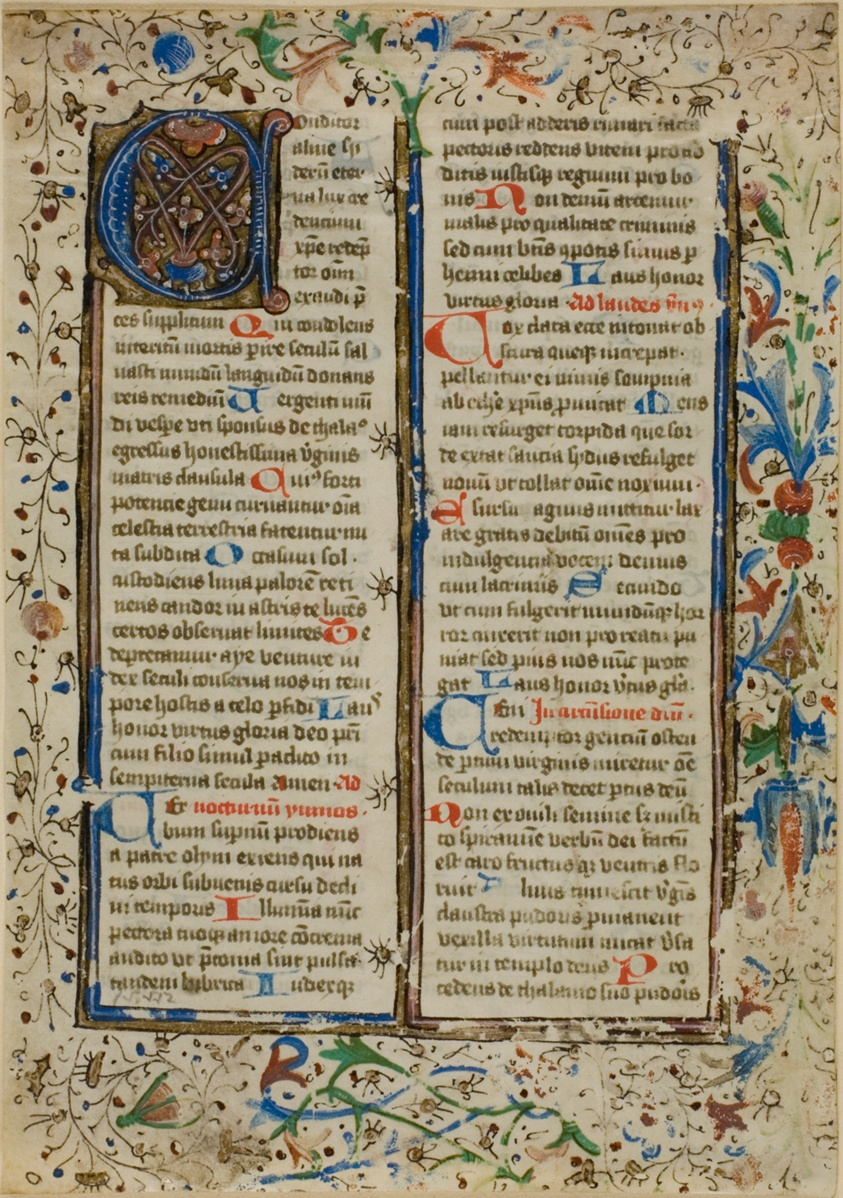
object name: Drawing and Watercolor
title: Illuminated Initial "A" from a Psalter or Breviary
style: medieval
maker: German or Southern Netherlandish (Bruges)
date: c. 1450s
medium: Manuscript cutting in tempera and gold leaf, with Latin inscriptions in brown and red ink, unruled, on vellum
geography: Germany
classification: tempera; manuscript; drawings (visual works); prints and drawing